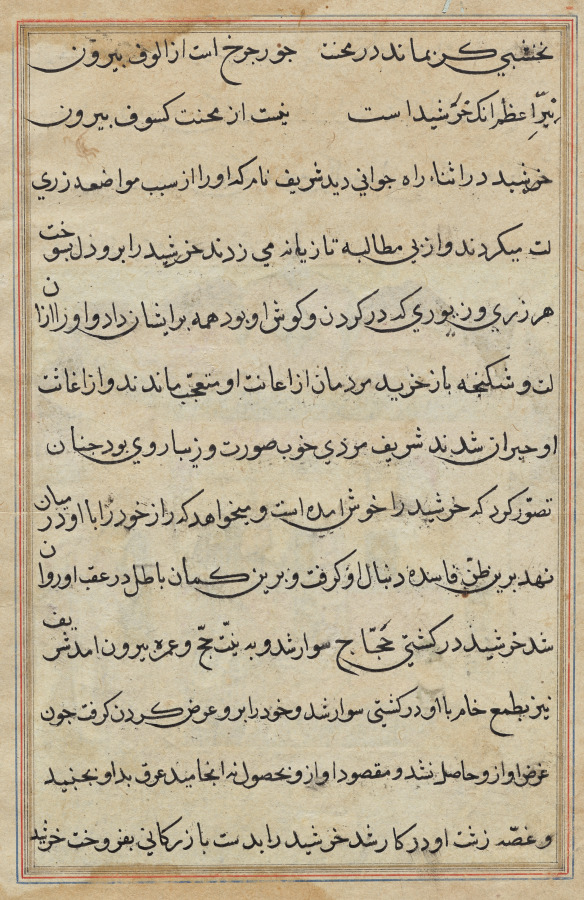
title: Page from Tales of a Parrot (Tuti-nama): text page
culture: Mughal India, court of Akbar (reigned 1556–1605)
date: c. 1560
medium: gum tempera, ink, and gold on paper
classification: Painting